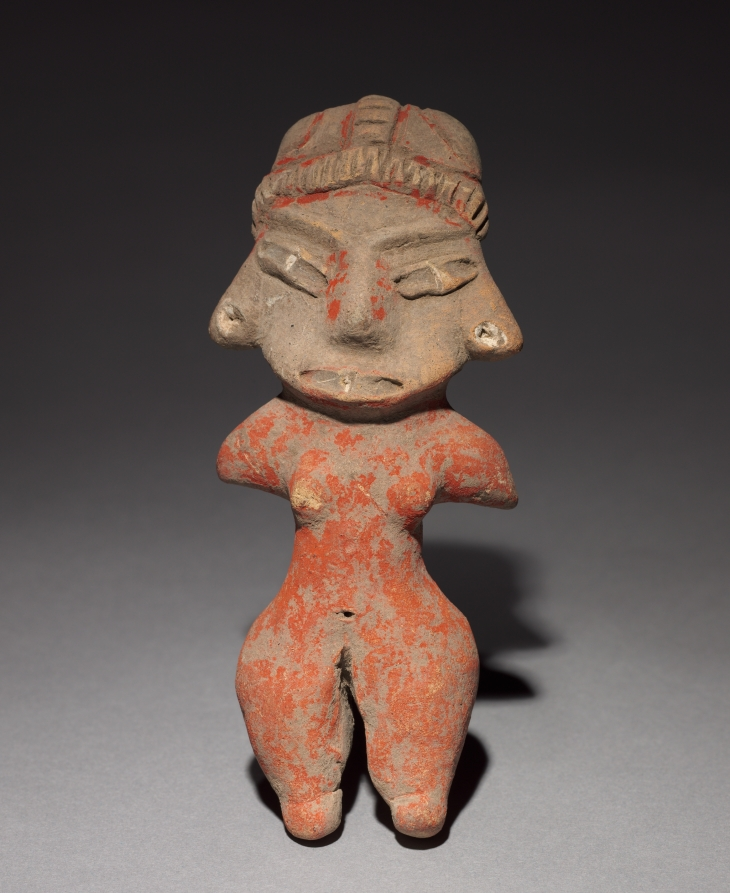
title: Female Figurine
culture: Mesoamerica, Central Mexico, Tlatilco, type D2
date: 1200–900 BCE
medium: pottery with white and red pigment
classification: Sculpture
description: This ceramic figurine—in the style of Tlatilco, an early village site in central Mexico—depicts a female with an enigmatic motif incised on the back of her head and substantial traces of red and white pigment. Since many figurines from the period depict females, modern interpreters usually connect them to fertility concerns. They also seem to testify to the importance of women among early Mesoamerican cultures.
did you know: While many figurines are nude, they were likely dressed in perishable clothing and accessories.